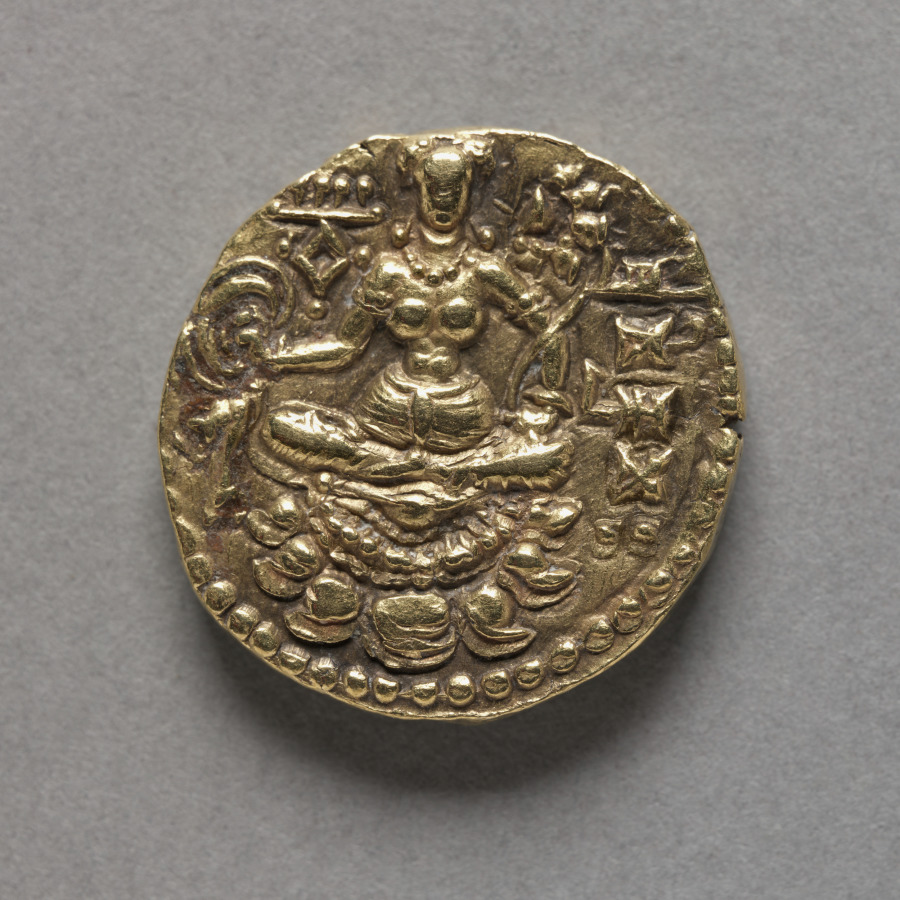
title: Coin with Figure of an Archer (reverse)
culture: India, Chandragupta II, Gupta Period, late 4th-early 5th century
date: c. 400 CE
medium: gold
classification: Coins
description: The rulers of the Gupta dynasty unified northern India under native rule for the first time since the Maurya empire (323-185 bc). The Guptas named themselves after Chandragupta, the founder of the Maurya dynasty. This coin of Chandragupta II, who ruled from around ad 380 to 415, depicts a divine archer holding a bow and arrow. On the reverse is the Indian goddess of good fortune, Shri, seated on a lotus.